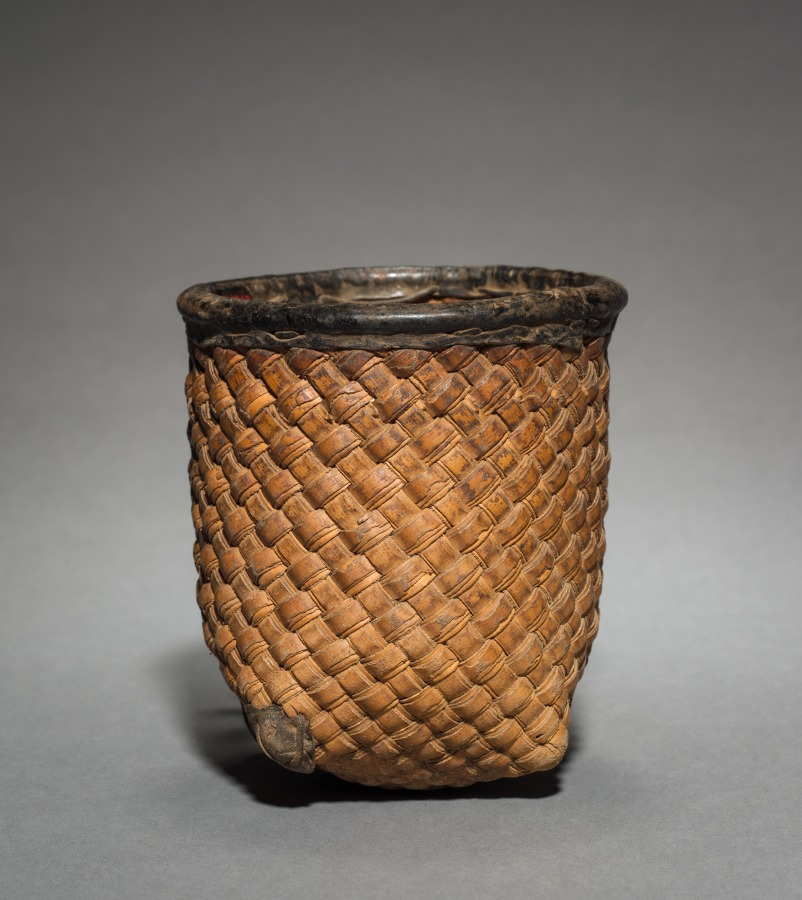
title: One of Ten Nesting Wedding Baskets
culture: Africa, Western Africa, Burkina Faso, Lobi–style maker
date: c. 1900s?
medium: Plant fiber and leather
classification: Vessels